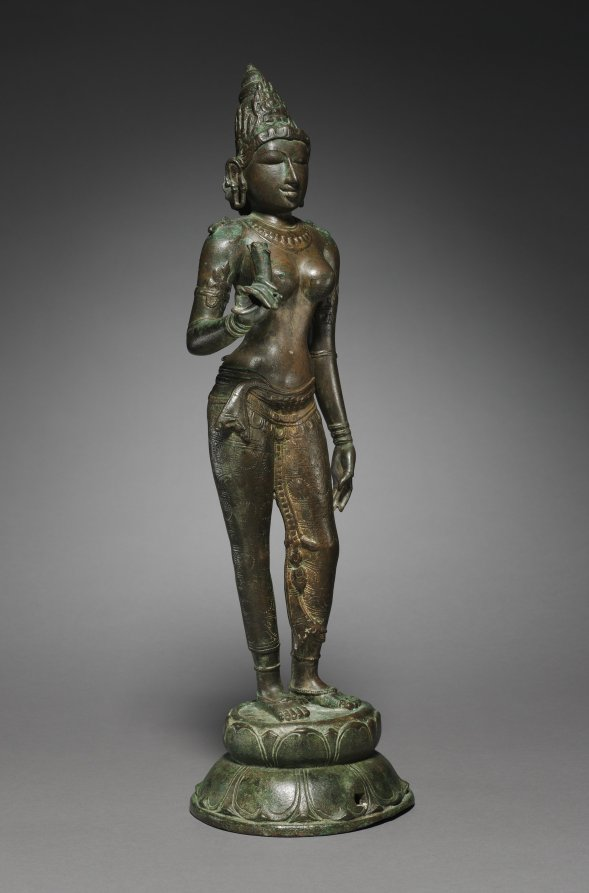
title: Goddess Holding a Lotus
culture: South India, Tamil Nadu, Chola period (900-13th Century)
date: c. 950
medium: bronze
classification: Sculpture